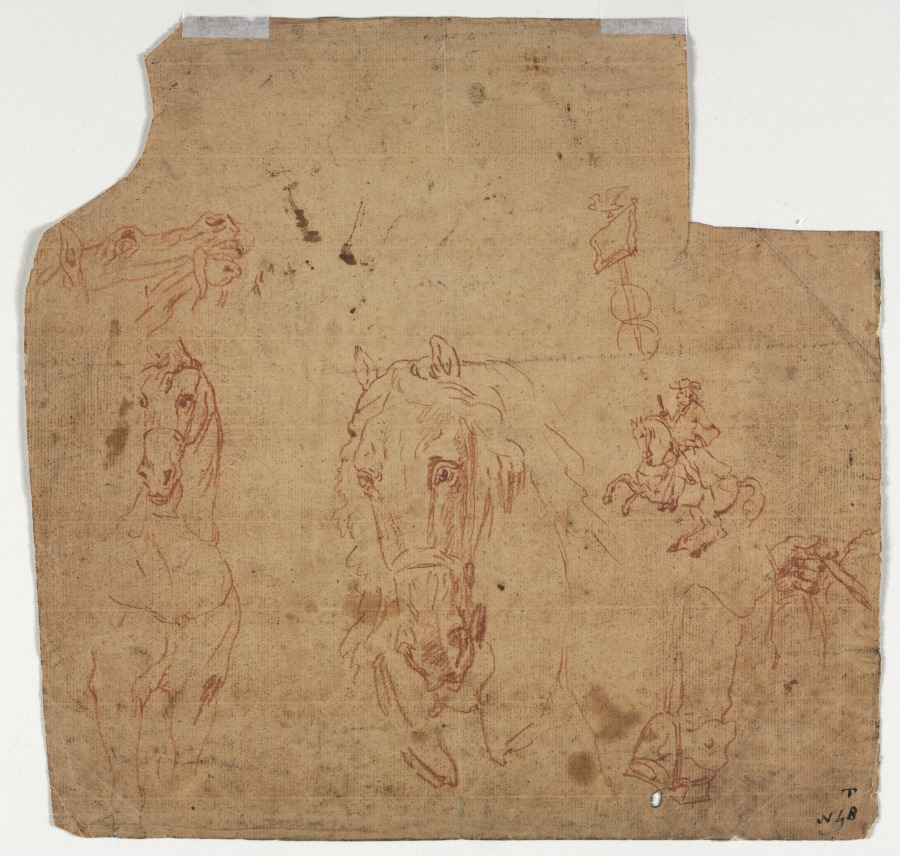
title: Sketches of Horses and Riders (recto); Sketches of Horses (verso)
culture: Flanders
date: 1600s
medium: red chalk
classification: Drawing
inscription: recto: lower right, in graphite: 9 ; lower right, in brown ink: T / N48 [written over the "9"] verso: upper center, in red chalk: VIRTUTJS / HONORJS ; left center, in graphite: 814 ; lower right, in graphite: [illegible, beneath CMA stamp] 3 3 / [9?]